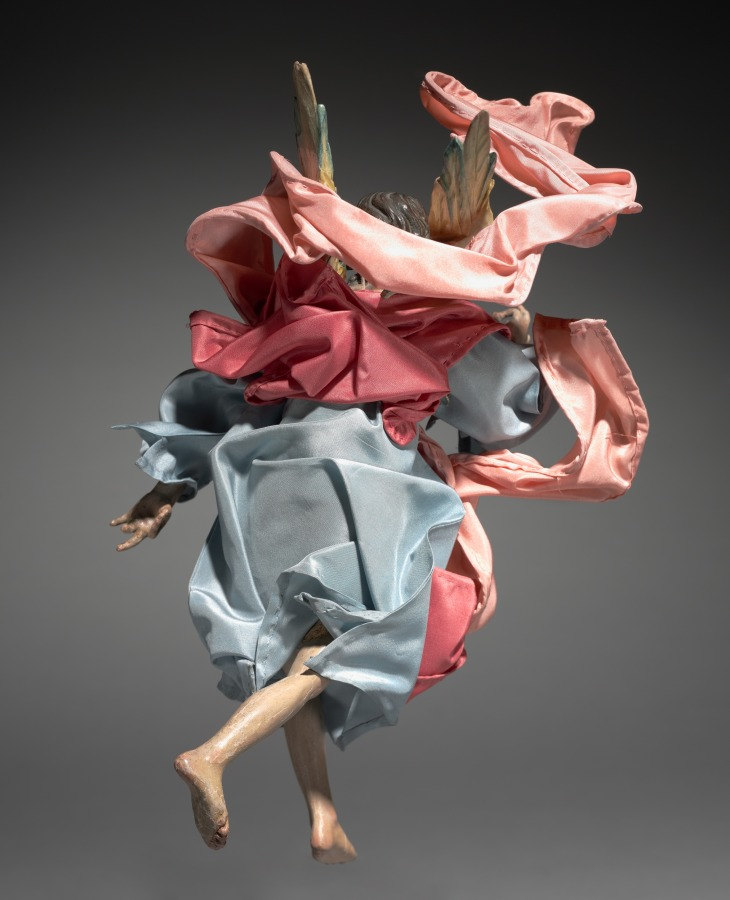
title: Figure from a Crèche: Angel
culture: Italy, Naples, late 18th-early 19th century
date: 1780–1830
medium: painted wood and terracotta with various textiles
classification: Sculpture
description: The practice of creating scenes of the Nativity for the home dates from the early 1700s in Italy, where people began to set up doll-like figures of about a foot or less in height. The custom was particularly popular in Naples around 1800, where crèche scenes (crèche means cradle, or crib) included many figures, whose heads and hands of painted terracotta, stuffed cloth bodies, and clothing adapted from contemporary local costumes gave them an amazingly realistic character. Representations of the birth of Jesus can be traced to the first few centuries of Christianity. Both living creatures and sculptural depictions of them were used from early times. By the late middle ages it was customary to create life-size figures of wood or stone, naturalistically painted, to represent the characters who participated in the events of Jesus's early life. These sculptures were then arranged in scenes illustrating one or both of the most important of these events, the Adoration of the Shepherds and the Adoration of the Magi-the three kings from the East who came to pay homage to the Christ child. Used in churches, these large figures were especially popular in Italy, Central Europe, Spain, and Portugal.